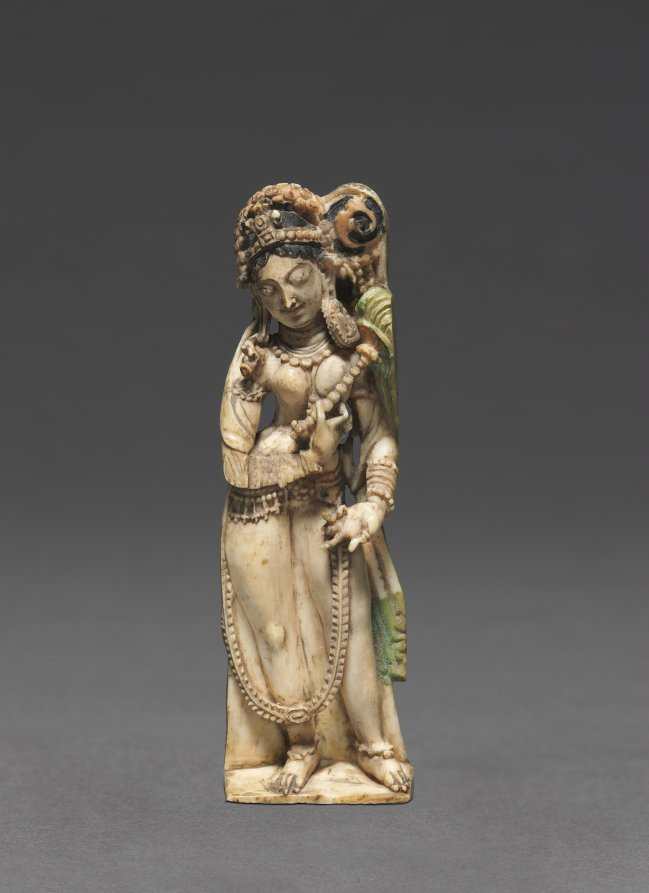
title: Female Attendant Bearing Fly-Whisk (Chauri)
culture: India, Kashmir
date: 700s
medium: ivory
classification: Ivory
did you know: The chaurī, or flywhisk, is a frequent attribute of attendants.